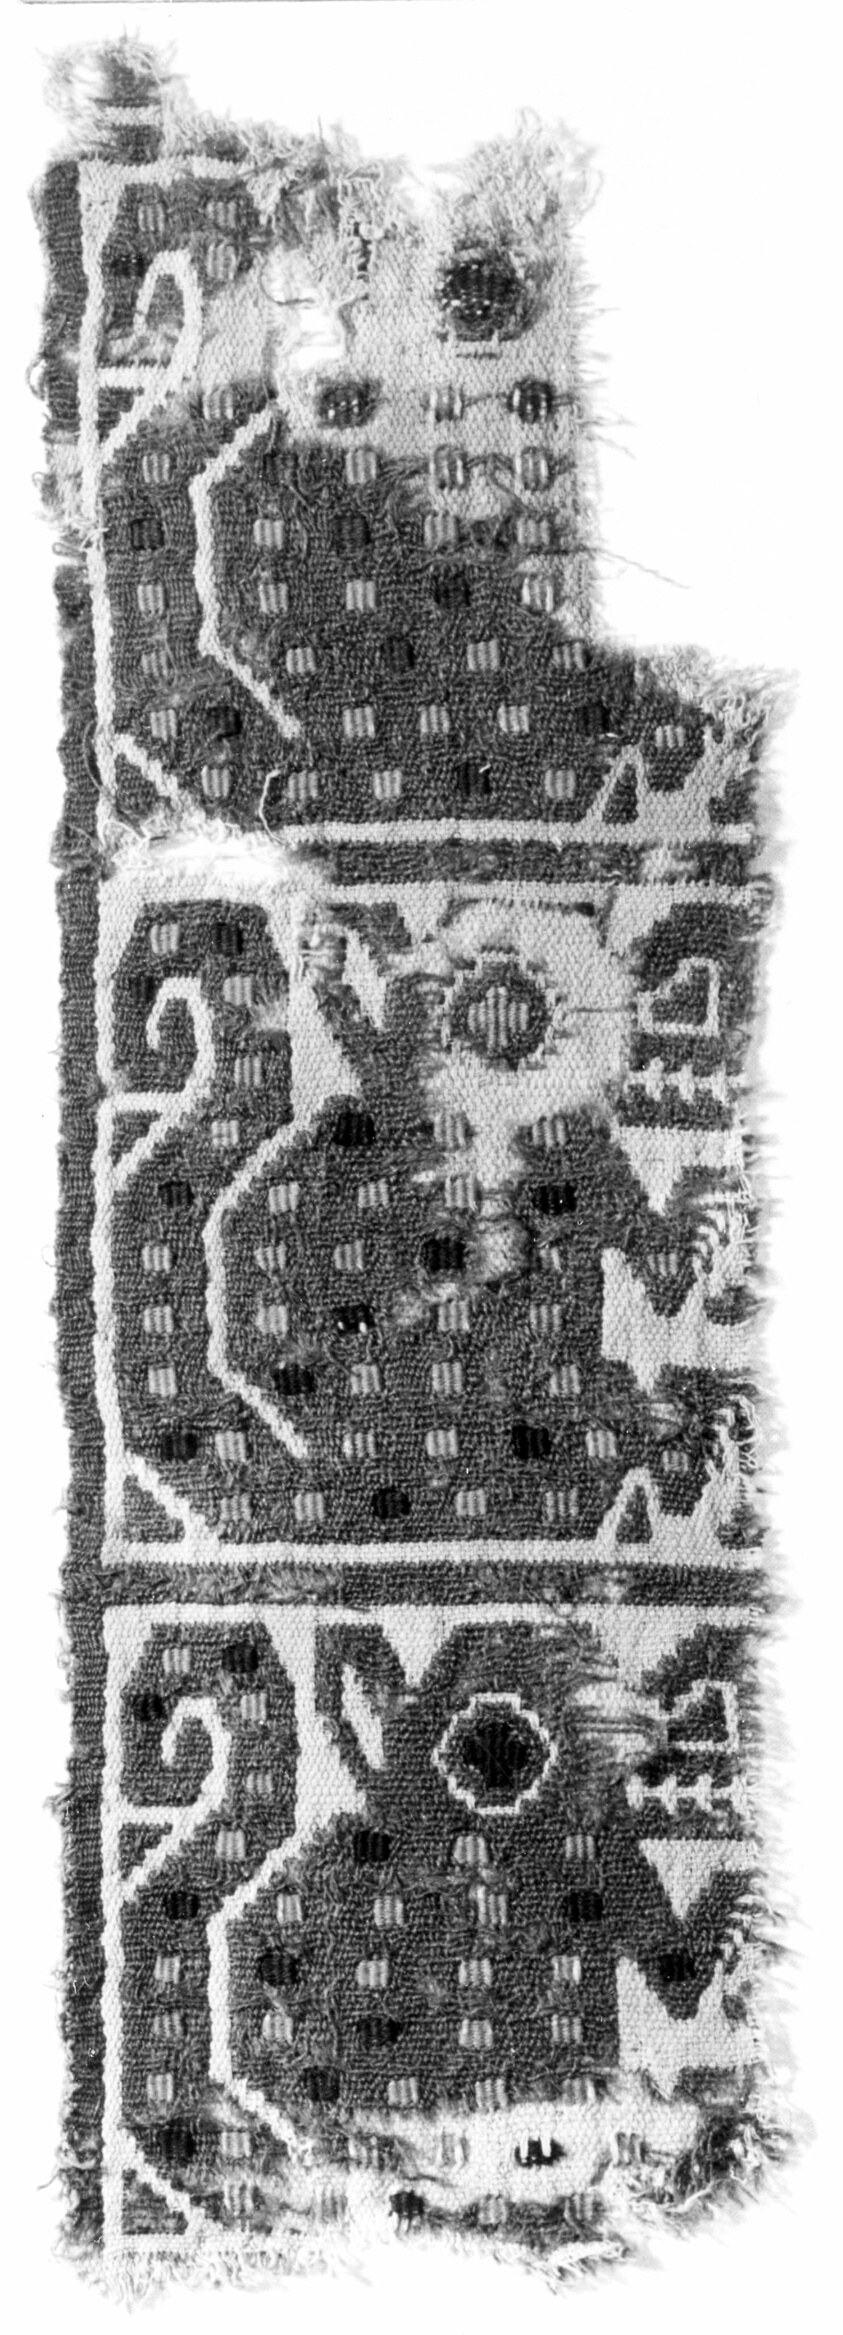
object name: Textile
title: Fragment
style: moche, andean, andes, Pre-Columbian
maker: Moche-Wari; Peru, north coast, Possibly Huarmey Valley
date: A.D. 500/1000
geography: Peru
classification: textile; weaving